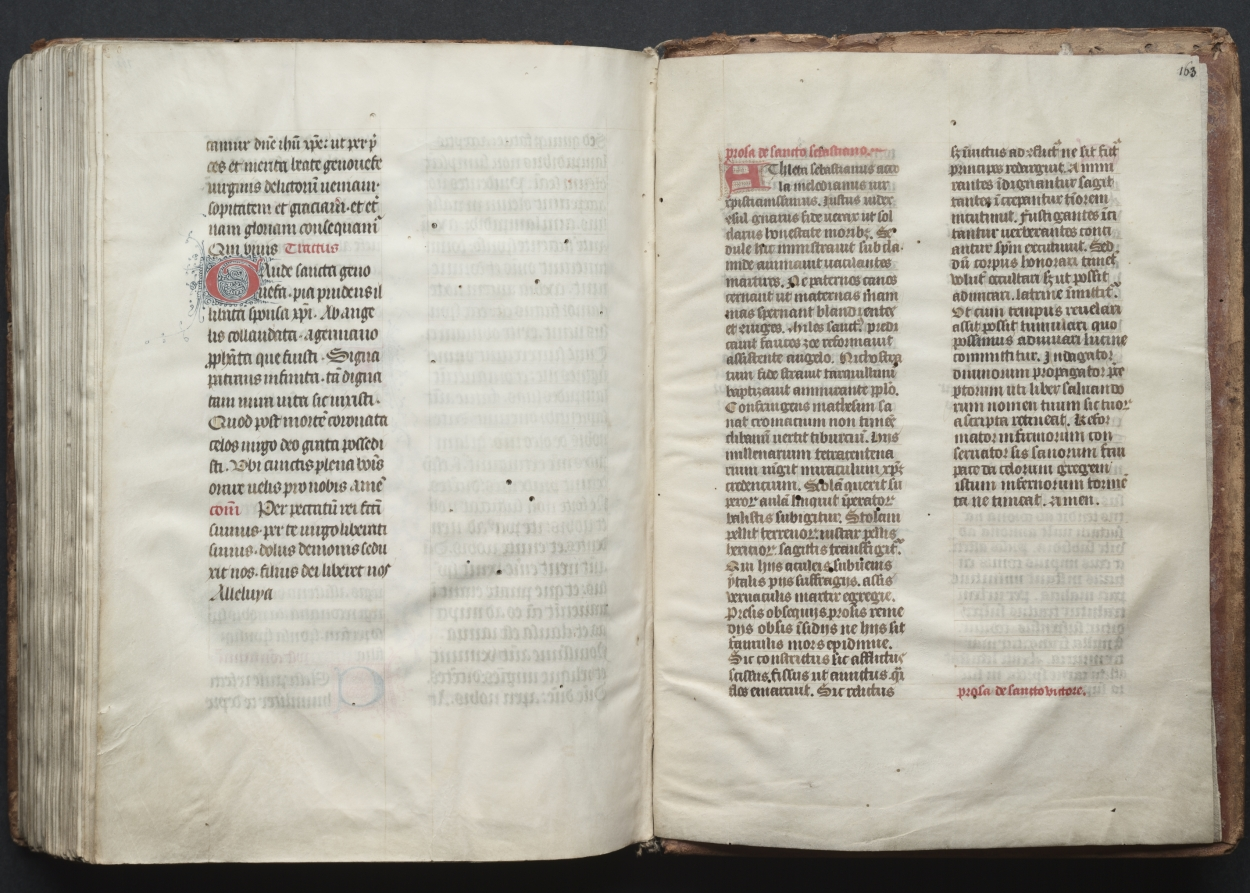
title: The Gotha Missal: Fol. 162v, Text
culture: France, Paris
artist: Master of the Boqueteaux (French)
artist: and Workshop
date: c. 1375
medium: ink, tempera, and gold on vellum; blind-tooled leather binding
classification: Bound Volume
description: The style and quality of this manuscript's decoration is typical of deluxe Parisian books made for aristocratic or royal patrons. Most of the book's decoration appears to be the work of the Master of the Boqueteaux, an artist active at the court of King Charles V (died 1380). His style was apparently shared by a number of book illuminators working in and around Paris. It is very possible that the Gotha Missal belonged to Charles V, but is not provable because the manuscript has no royal portraits and lacks a colophon. Given the book's magnificent decoration, however, it would seem that it was produced for a Valois prince, if not for the king himself. The manuscript receives its name from the German dukes of Gotha, its later owners.